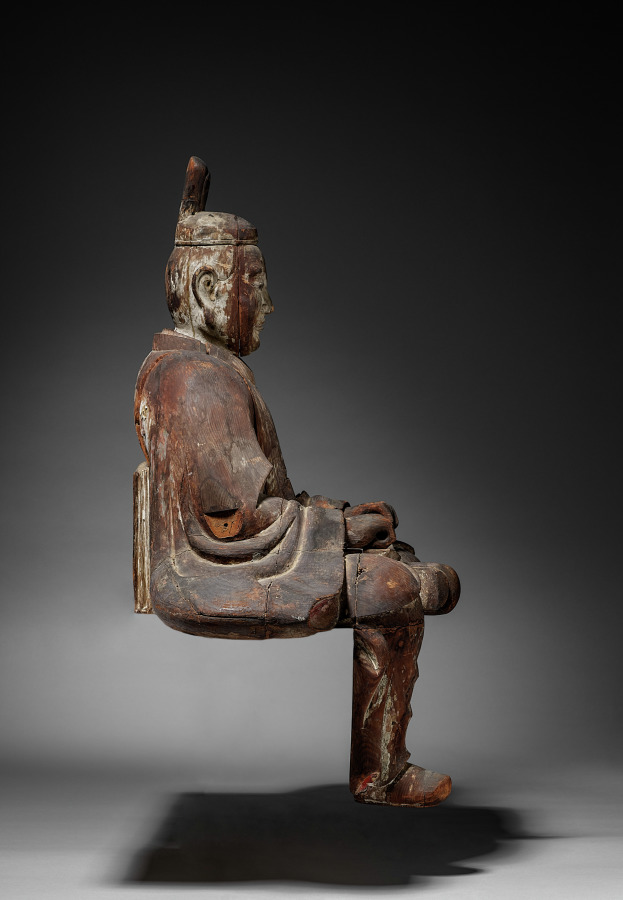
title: One of a Pair of Guardian Figures (Zuishin)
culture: Japan, Muromachi period (1392–1573) to Edo period (1615–1858)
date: c. 1560–1625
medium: Japanese cypress (hinoki) with traces of color; crystal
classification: Sculpture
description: Sculptors carved these two figures to look like members of the guard who protected the Japanese aristocracy in the 10th to 12th centuries. The pair belong in the roofed gate of a Shinto shrine. Their role was to embody the divine protectors of the deities, or kami, residing at the shrine. Their inset crystal eyes make them appear vigilant.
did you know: Some Japanese sculptors used to specialize in inset crystal eyes.